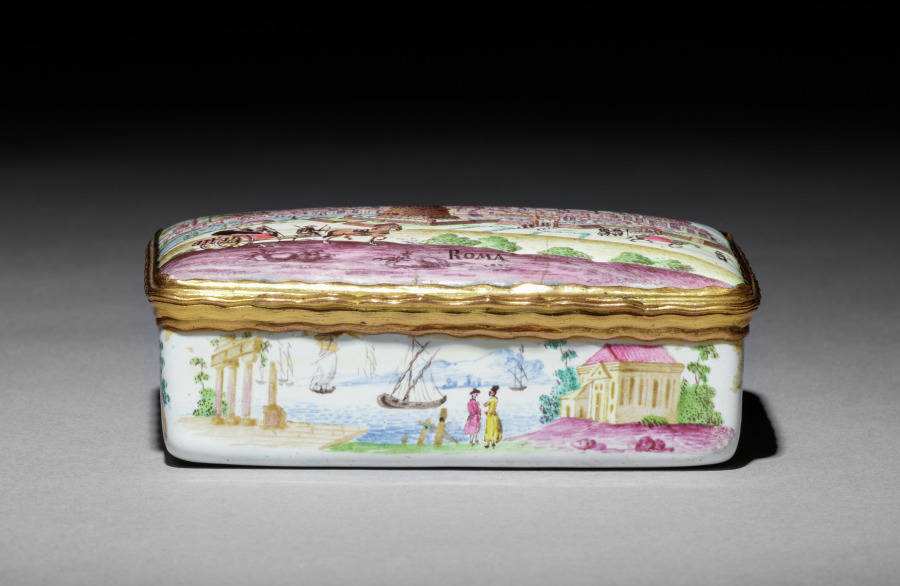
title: Snuff Box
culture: Austria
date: c. 1750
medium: enamel on copper with metal mounts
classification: Miscellaneous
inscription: on top there are a number of inscriptions in black: "Roma," "Trevere R," "C:ST: Ang" (for Castello San Angelo), "S: Pe:" (for San Pietro), "S.G.L." (probably for San Giovanni Laterano). on interior of lid: "WIENNE."